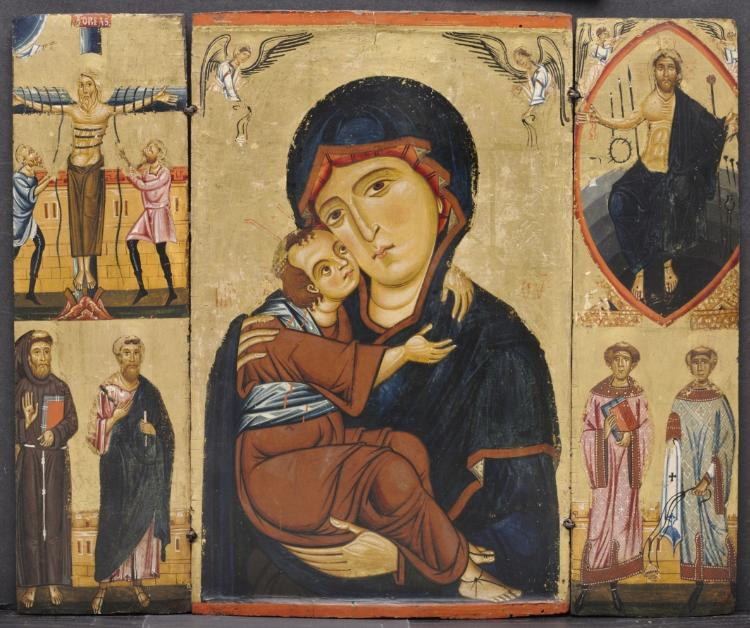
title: Virgin and Child with Saints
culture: Italy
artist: Berlinghiero (Italian, before 1242)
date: c. 1230s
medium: triptych (tabernacle); tempera and gold on poplar panel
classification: Painting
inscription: Inscribed on central panel flanking Virgin: MP OV. On back of panel: XC IC HS NI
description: This small altarpiece, intended for a domestic interior or private chapel, consists of three panels, allowing it to be folded and easily transported. Surrounding the Virgin and Child in the center are various saints. On the left is Saint Andrew crucified, with St. Francis and St. Paul below; on the right, Christ with the instruments of the Passion, and St. Stephen and St. Lawrence below. The long expressive lines that define the clothing and hands of the figures are typical of Byzantine painting, which spread from Constantinople to Italy in the Middle Ages. Berlinghiero is one of the earliest Italian painters known by name. He lived in Lucca, the most important artistic center in Tuscany before the rise of Siena and Florence. Berlinghiero headed a large, influential workshop that included his sons.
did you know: This tabernacle was recognized as being by Berlinghiero while in the the collection of Adolphe Stoclet, a wealthy Belgian engineer and collector.